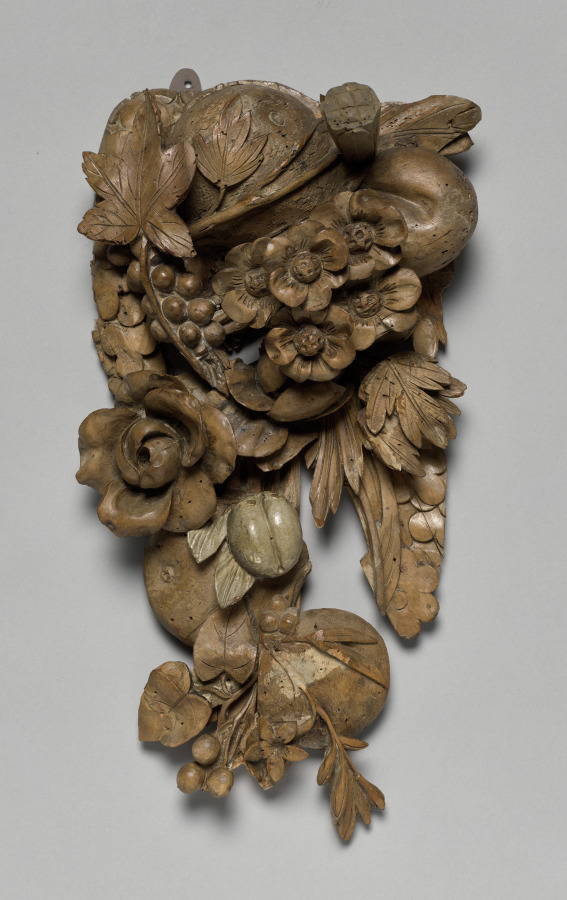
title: Carving from an Overmantel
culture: England, 17th century (Charles II)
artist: Grinling Gibbons (British, 1648–1721)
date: c. 1675–77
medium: linden wood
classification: Sculpture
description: The arrangement of architectural elements within grand interior spaces in the late 1600s and early 1700s emphasized symmetry and height. Decorative elements such as elaborately carved mantels, mirrors, paintings, and applied wall decorations were often stacked to achieve a visual focal point at one or both ends of the room. This particular overmantel decoration once hung above the fireplace in the Green Drawing Room of the Earl of Essex at Cassiobury in Watford, near London. In 1823, the British painter William Henry Hunt (1790–1864) produced a watercolor of the drawing room which featured this overmantel decoration. Grinling Gibbons was born in Rotterdam, the Netherlands, of English parents. After training there as an artist, he came to England in the 1660s and soon began to work as a sculptor of interior ornament, particularly in wood. One of his first large-scale decorative projects was the series of interiors at Cassiobury House.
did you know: The swags of fruit and foliage featured in this wooden overmantel decoration evoke the bounty of the English countryside.